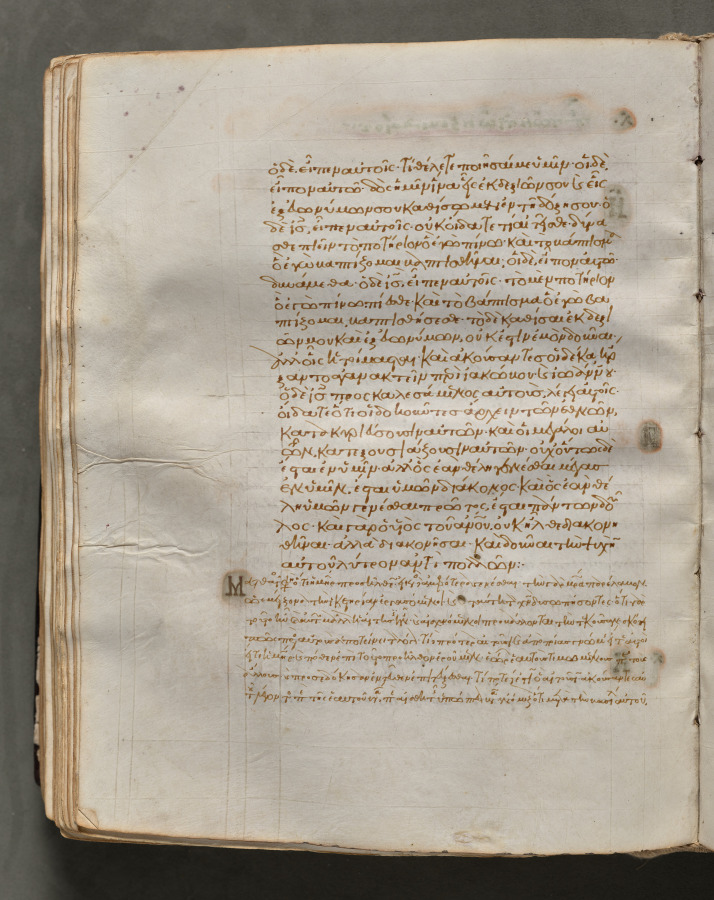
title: Text, folio 171 (verso), from a Gospel Book with Commentaries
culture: Byzantium, Constantinople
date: c. 1000–1100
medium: ink, tempera, and gold on vellum; leather binding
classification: Bound Volume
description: Each of the four gospels in this book opens on a page with brilliantly illuminated borders depicting the author of the text as well as birds-principally peacocks, symbols of the immortality of the soul-and fountains, representing the fountain of life and the salvation of the soul. This volume consists of 428 leaves with texts in Greek. Its level of sophistication suggests that it was probably written and decorated in a monastery in Constantinople.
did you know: Gospel Books were carried in procession through Byzantine churches.